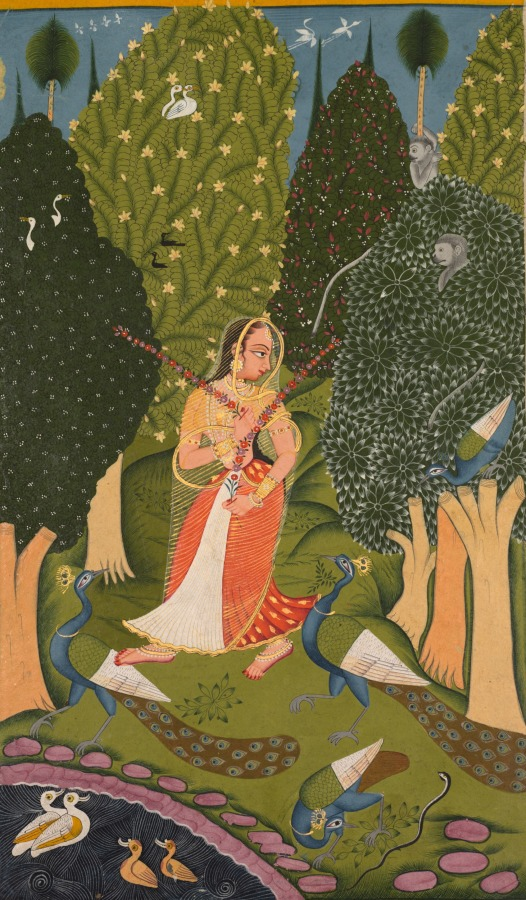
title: Gaudi Ragini, page from a Ragamala series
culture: India, Rajasthan, possibly Raghugarh school, late 18th Century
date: c. 1780–1800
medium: Gum tempera, ink, and gold on paper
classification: Painting